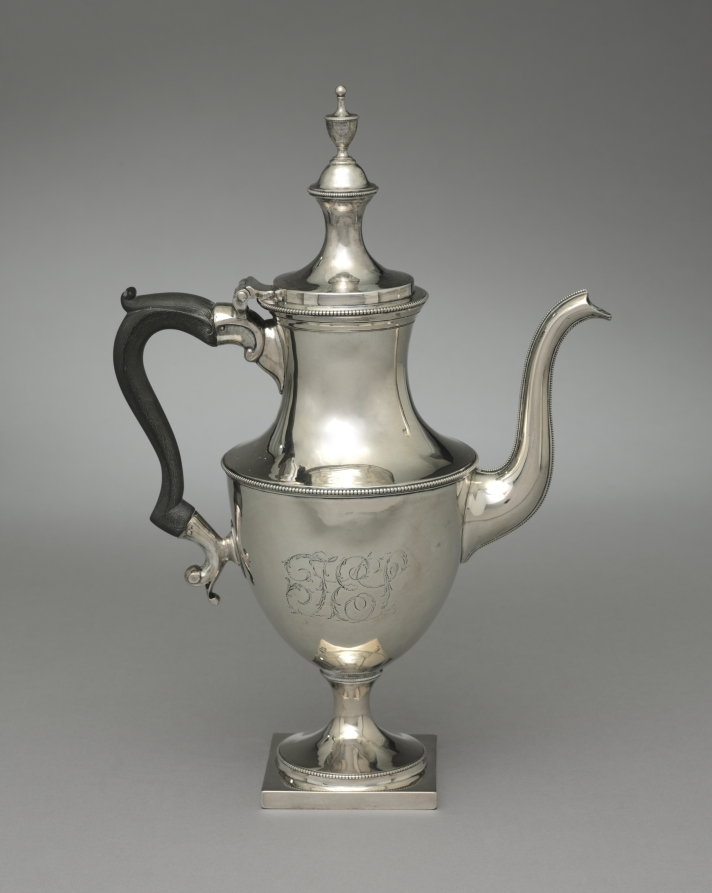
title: Coffee Pot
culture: America, Pennsylvania, Philadelphia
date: c. 1800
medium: silver, wooden handle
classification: Silver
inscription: engraved: "TES" in foliate scroll on side of pot.